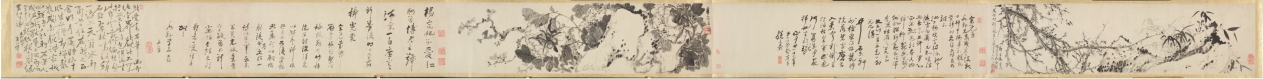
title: Plum Blossoms and Peonies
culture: China, Qing dynasty (1644-1911)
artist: Gao Fenghan (Chinese, 1683–1749)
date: 1741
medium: handscroll, ink on paper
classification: Painting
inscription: Artist's 2 inscriptions and 9 seals (the painting of Peonies with the artist's colophon and the colophon by Hou Chia-fan are on a single sheet of paper). Artist's inscription and 2 seals (Plum Blossoms): [seal] Ts'ai-yün. After finishing writing my colophon, I unrolled the painting to take another look, and it now seems that the composition here should have moved to the later part of the scroll. If that is the case, then the "Cool Beauty" [prunus] of the Solitary Hill is after all unable to take precedence over the "King of Flowers" [peony]. A laugh. Lao-fou inscribed. [seal] Feng-han. Artist's colophon (Plum Blossoms): [3 seals] Tun; Yen-yün-kung-yang, Hou-shang-tso-sheng. A few days after I painted this scroll for Shui- hsien [Yüeh Meng-yüan], the plum blossoms were in full bloom at his residence. He invited me over to enjoy them together for a long while, and I composed two additional poems and wrote them down here for his criticism. [Poems on the colophon are not translated.] First month, twenty-first day, your junior, Kao Feng-han of Nan-fou drafted this with the left hand. [seal] Feng-han. Artist's inscription and 4 seals (Peonies): Brushed with the left hand in the hsin-yu year [1741]. [seal] Yu-hsi. [3 seals at end of painting] Hou-shang-tso-sheng; Yen-yün-kung-yang; Shih-tsao-wu. Artist's colophon and seal (Peonies): The imperial concubine from the Yang family loved to dress in red, And from the emperor won the title of Hai-t'ang. But ever since she became the new dream of the moon palace, She changed into rainbow colors, while learning to dance. After I wrote the poem on Looking for Plum Blossoms in the Teng-wei Mountains, I attached to it a few branches of prunus, some bamboo tips and a piece of rock, with a scattering of green [moss] here and there to fill up the scroll. Unexpectedly, my playful fascination [with these subjects] was still not quite satisfied, so I made up these amorous ideas and romantic images [of the peony], to follow the footsteps of the fair lady of the Ku-hsieh Mountain [prunus]. Furthermore, I picked out one poem to be my vanguard. Perhaps such luminosity of wealth and power will be enough to overwhelm the poor fellows, and [they] will not mind the comparatively short length [of paper] assigned to it. Amusingly inscribed. Please correct me again. To Shui-hsien, my learned senior, your junior Han inscribed again. [seal] Tso-hua [left-handed painting]. 1 additional colophon and 5 additional seals: 1 colophon, dated 1742, and 3 seals of Hou Chia-fan (act. ca. 1742); 1 seal of P'u Ch'üan (20th c.?); 1 seal of Li family (dates unknown).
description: One of the so-called Yangzhou Eccentrics (a group of painters who lived in Yangzhou and were known for their unorthodox art and lifestyle), Gao Fenghan depicts China’s two most loved flowers in full bloom—the “cold beauty,” or plum blossom, in the first section, and the “king of flowers,” or peony, in the second section. Painted in 1741, the year when Gao decided to leave the south and return home to Shandong province in eastern China, this work was likely a token of farewell. His casual brushwork may indicate his mental and physical struggle at the time. After having crippled his right hand in 1737, Gao used his left hand to paint and achieved a crudeness and eccentric style unattainable before.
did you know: In East Asian art, peonies traditionally symbolize prosperity and wealth.